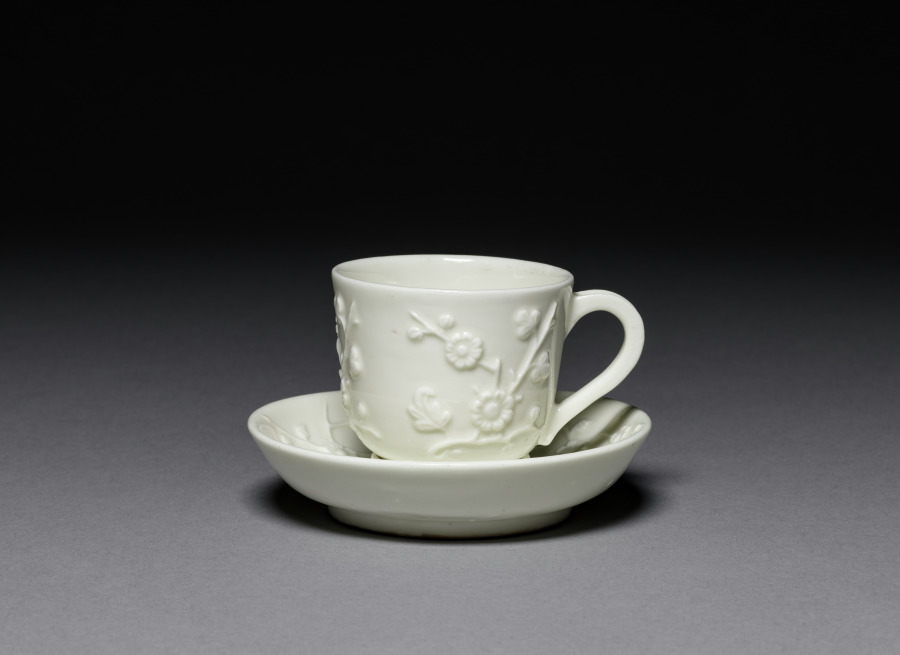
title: Cup and Saucer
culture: France, 18th century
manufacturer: Saint Cloud Porcelain Factory (French)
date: 1775–99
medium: soft-paste porcelain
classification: Ceramic